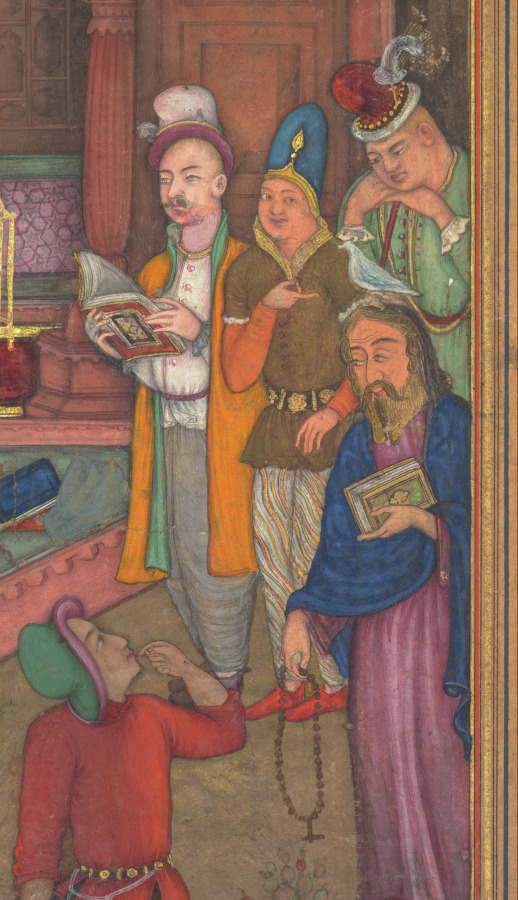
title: John the Baptist recognizes Christ by the appearance of a dove (folio 50 verso), from a Mirror of Holiness (Mir’at al-quds) of Father Jerome Xavier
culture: Mughal India, Allahabad, made for Prince Salim (1569–1627)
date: 1602–4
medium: Gum tempera, ink, and gold on paper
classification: Manuscript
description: Wearing the black robes and cap of a Jesuit priest, John the Baptist sits in a well-appointed Mughal-style courtyard. According to Father Jerome’s text, John recognizes Jesus by the dove who sits on his head. Possibly Father Jerome intended to relate the Gospel account that describes the dove of the Holy Spirit as hovering in the air above his head. The artist’s own reactions to this passage may be reflected in the expressions and gestures of the onlookers, who seem incredulous and bemused at this sign.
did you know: Jesus holds a rosary with a cross even in scenes prior to his crucifixion.